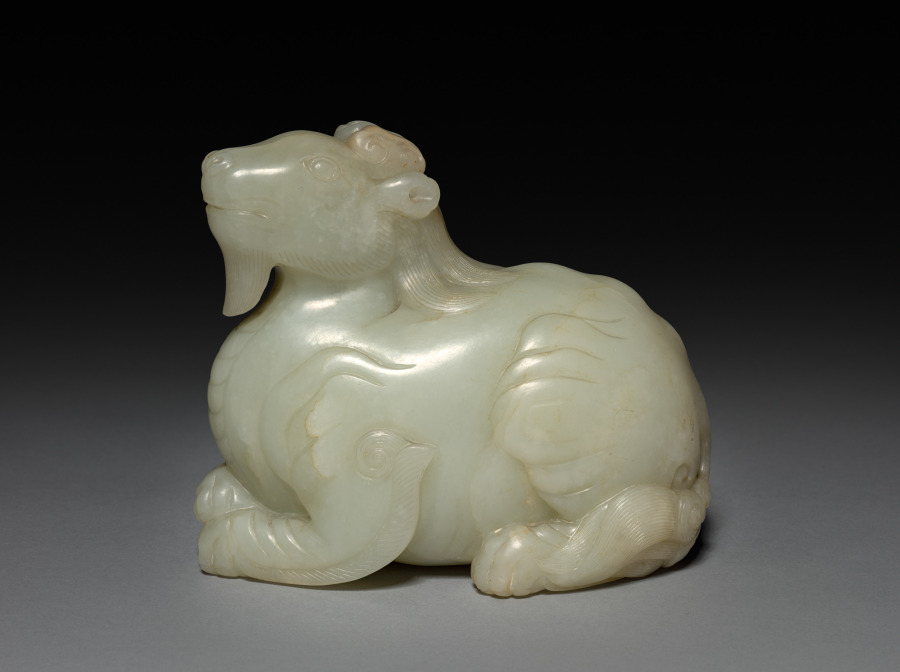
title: Fantastic Animal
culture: China, Qing dynasty (1644-1911)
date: 1700s–1800s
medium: jade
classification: Jade